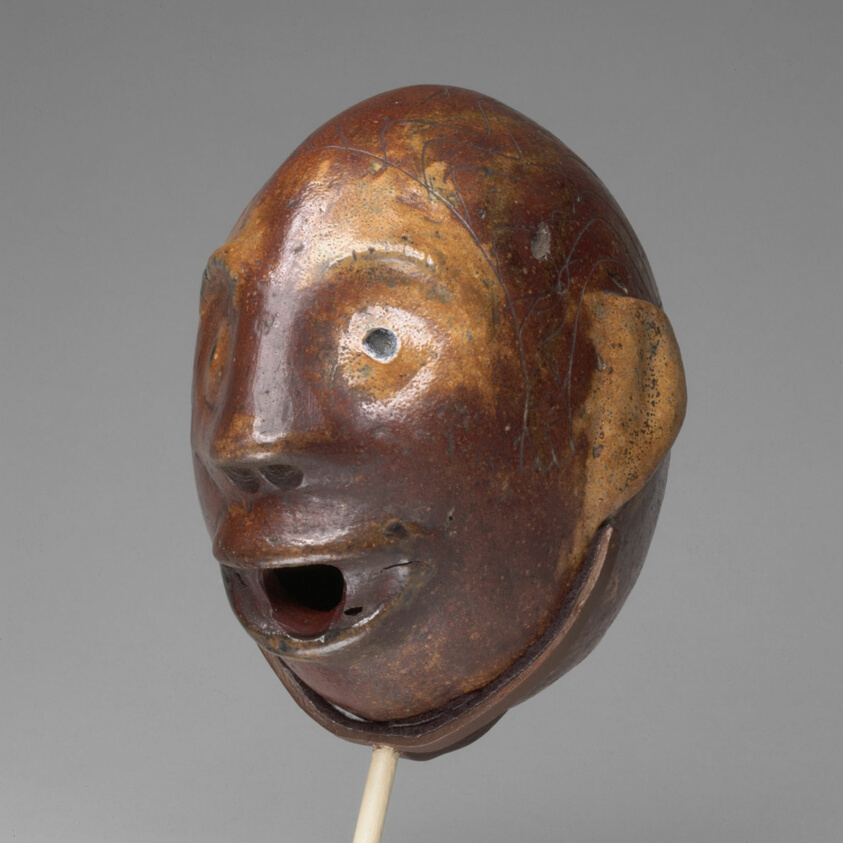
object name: Ceramics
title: Face Flask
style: Folk Art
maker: Artist unknown (American, 19th century); New England, possibly Connecticut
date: 1820–35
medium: Stoneware and salt glaze with iron and cobalt oxide glazes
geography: New England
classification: flask (bottle); american decorative arts; ceramics; decorative arts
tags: dining, drinking